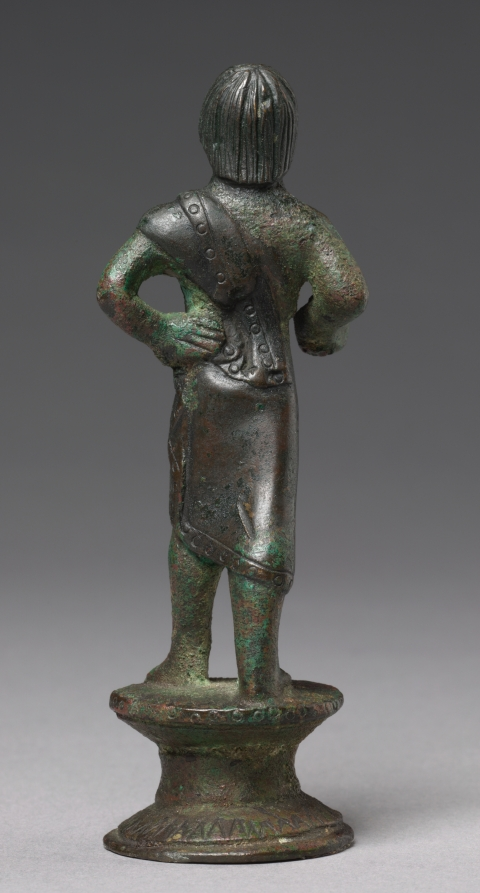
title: Statuette of a Youth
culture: Italy, Etruscan, Archaic Period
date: c. 520–500 BCE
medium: bronze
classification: Sculpture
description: Cast in one piece with its hollow base (perhaps designed to crown a candelabrum), this small bronze portrays a young man wearing a semicircular cloak adorned with punched circles along its edges. This likely represents an embroidered tebenna, an Etruscan forerunner to the Roman toga praetexta. He appears to stride forward, his right leg trailing behind and right hand extended, perhaps once holding an object.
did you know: Unusually, this figure places his hand on hip with thumb in front, fingers in back.